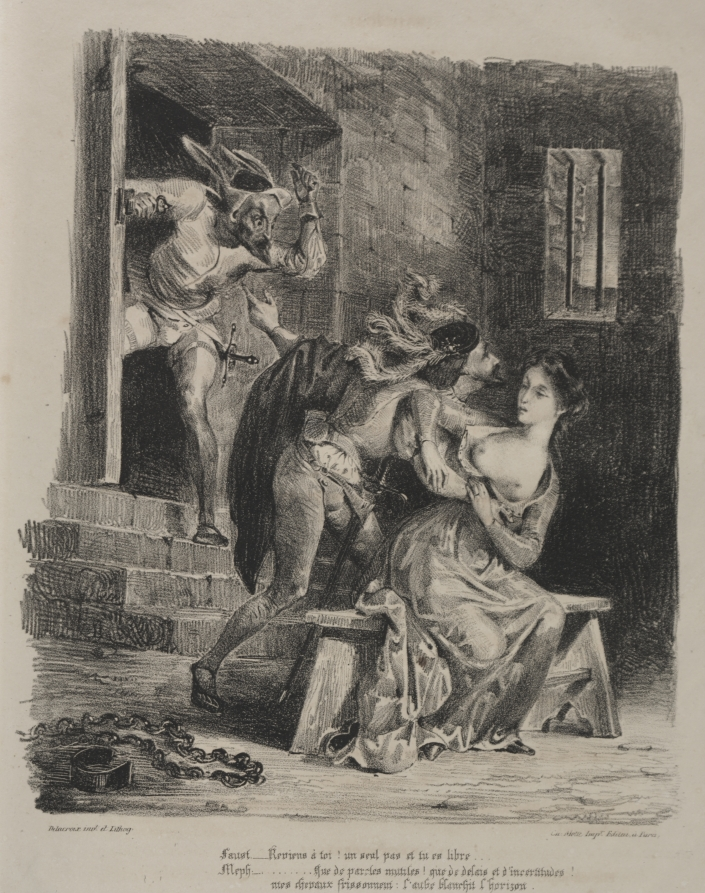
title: Illustrations for Faust: Faust in the prison of Marguerite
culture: France, 19th century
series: Faust: Tragédie de M. de Goethe, translated into French by Albert Stapfer.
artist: Eugène Delacroix (French, 1798–1863)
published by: Chez Ch. Motte, Éditeur, distributed by Chez Sautelet, Libraire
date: 1828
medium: lithograph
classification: Print